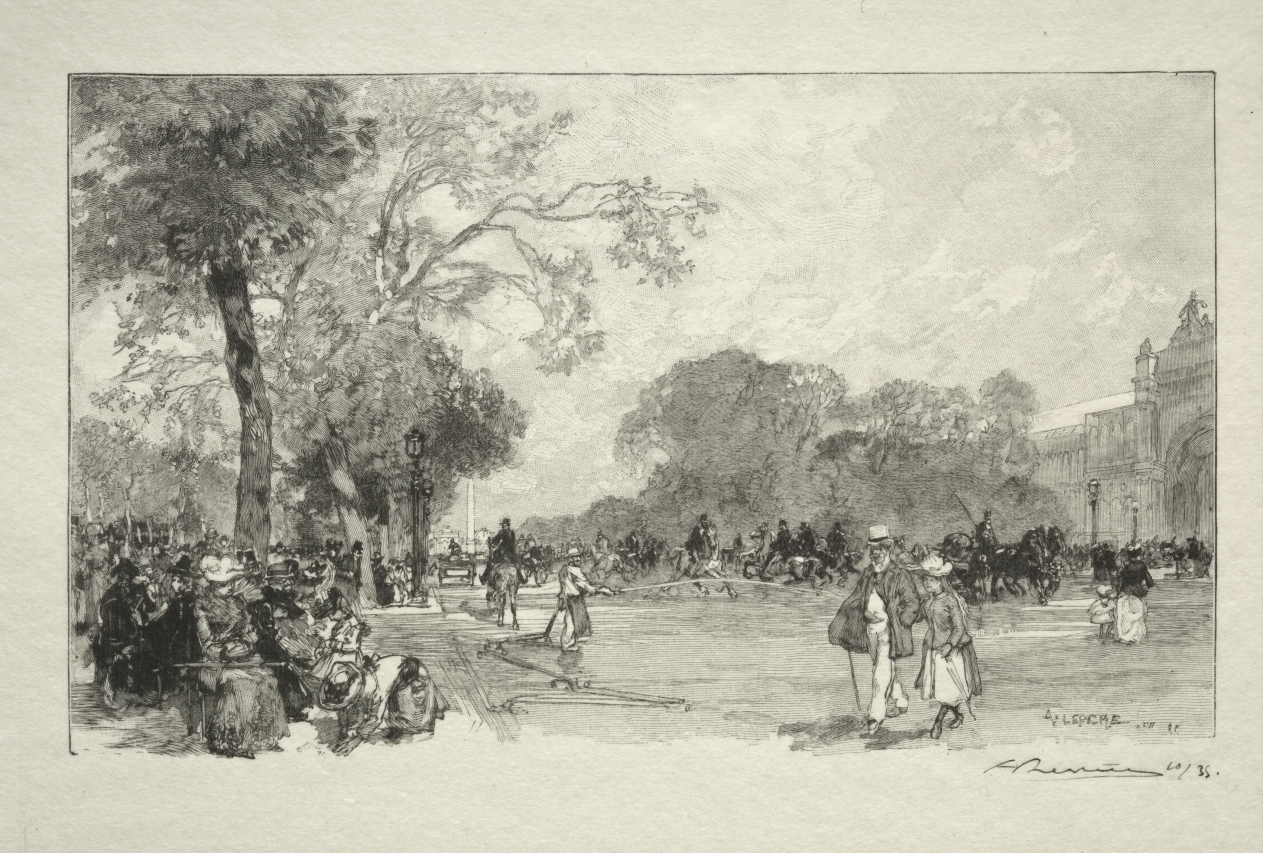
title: L'Avenue des Champs Elysées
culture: France, 19th-20th century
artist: Auguste Louis Lepère (French, 1849–1918)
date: 1890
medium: wood engraving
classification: Print